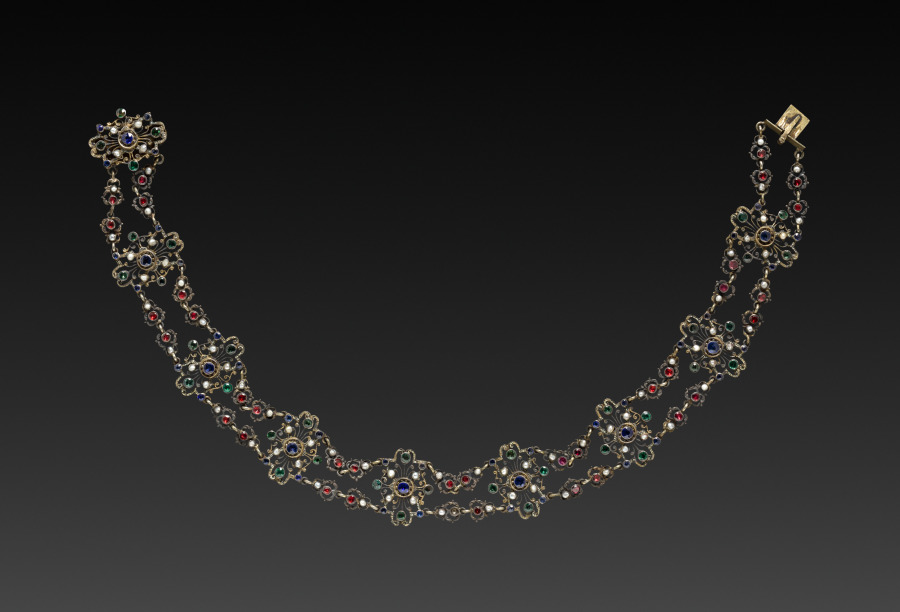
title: Necklace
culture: Hungary (?), 18th century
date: 1700s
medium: metal with pearls, stones and enamel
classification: Jewelry